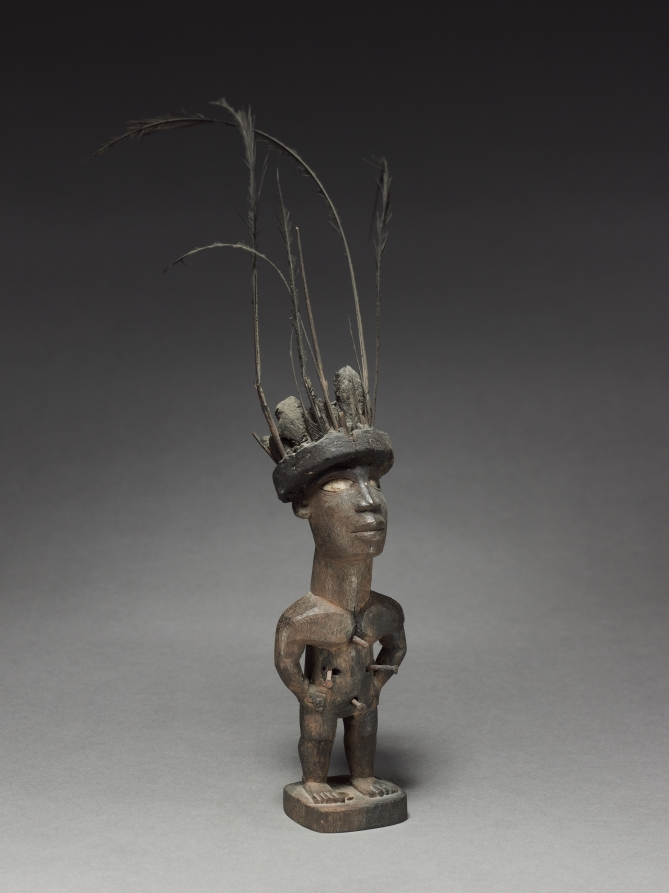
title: Power figure (nkisi)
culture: Africa, Central Africa, Republic of the Congo, Kongo-style maker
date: late 1800s–early 1900s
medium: Wood, feathers, organic material (including resin), iron, and possibly porcelain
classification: Sculpture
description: This figure had lost its nkisi load on the belly, but now shows how the mixture of earth, resin, leaves, glass, and other items was fixed onto the wooden figure, supported by four nails. It had been the property of “the sorcerer of Mboukou.”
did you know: This niksi figurine shows how the mixture of earth, resin, leaves, glass, and other items was fixed. It had been the property of “the sorcerer of Mboukou.”